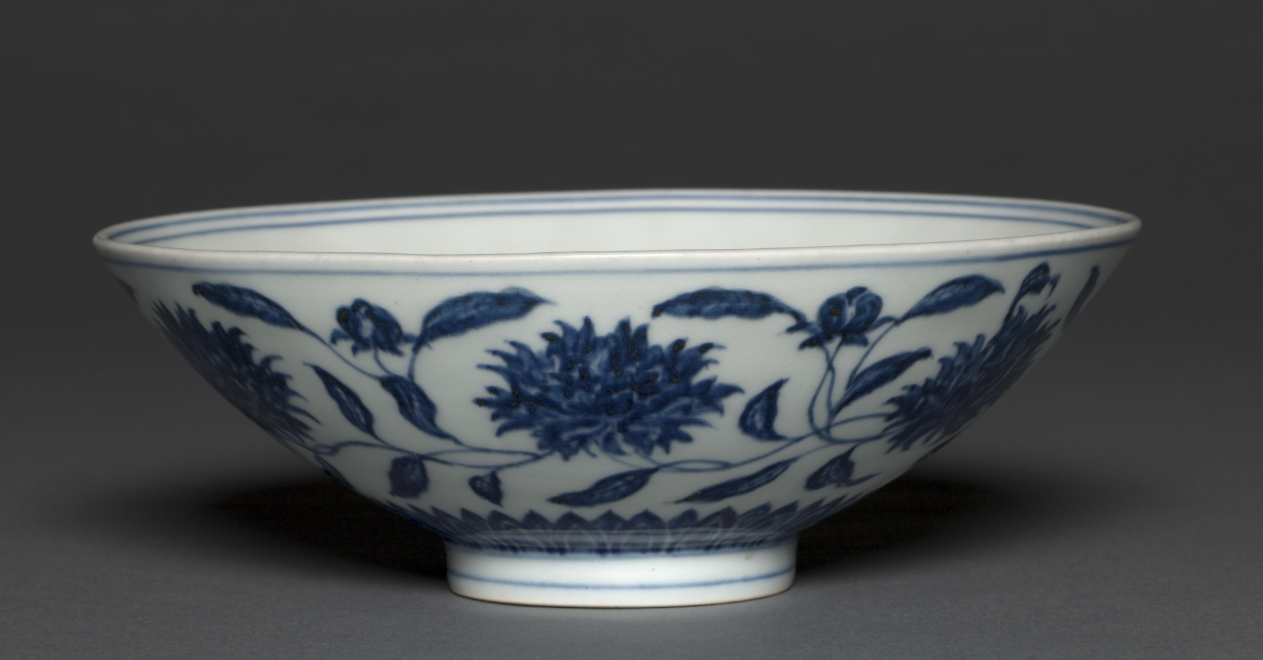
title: Bowl with Peony Decoration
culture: China, Ming dynasty (1368-1644), Xuande mark and reign (1425-1435)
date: 1426–35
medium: porcelain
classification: Ceramic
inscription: 大明宣德年製